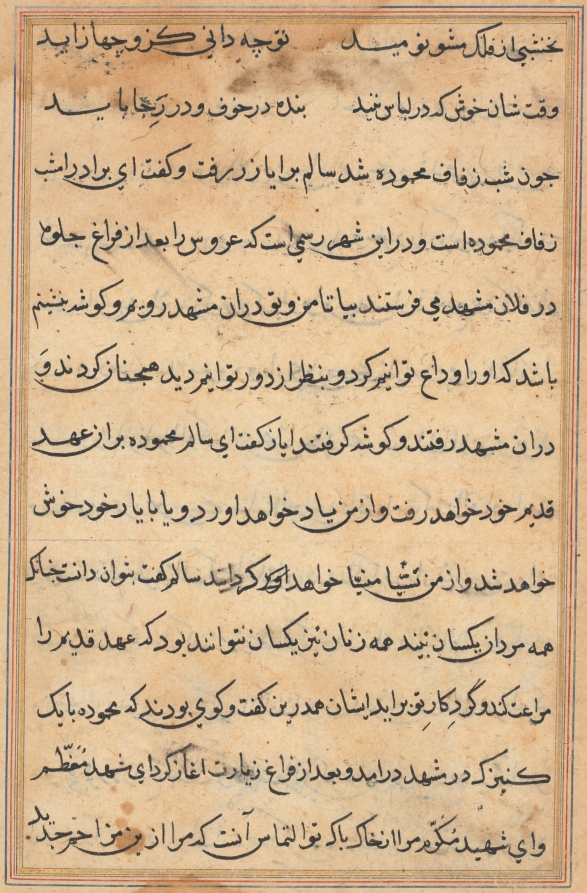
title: Page from Tales of a Parrot (Tuti-nama): text page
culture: Mughal India, court of Akbar (reigned 1556–1605)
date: c. 1560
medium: gum tempera, ink, and gold on paper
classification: Painting